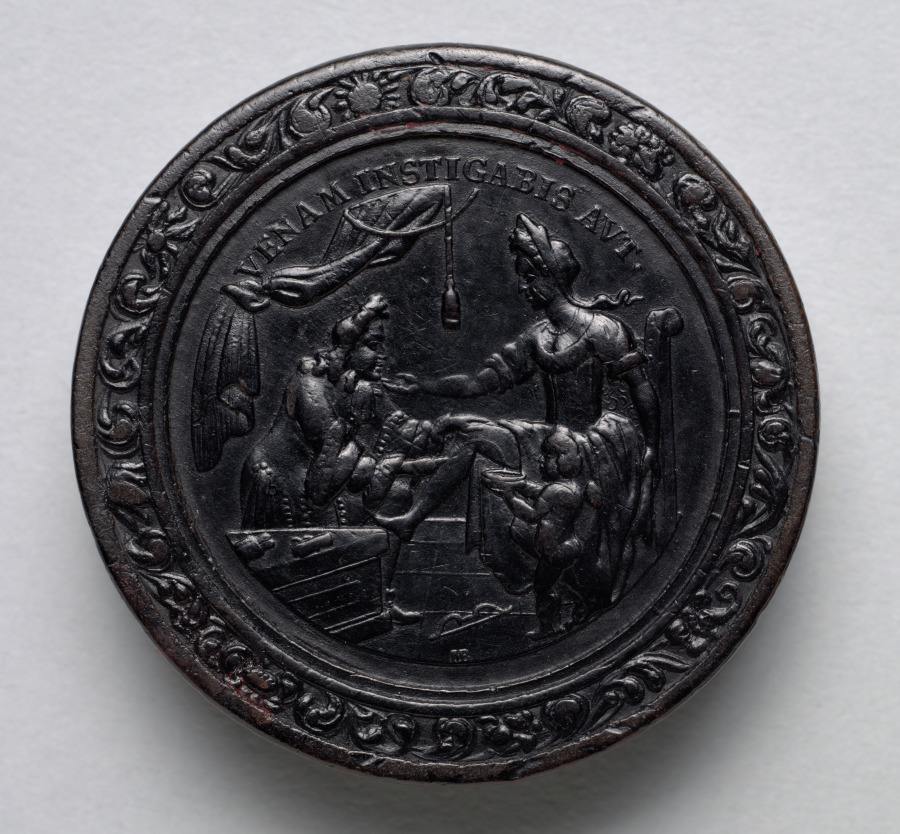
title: Gaming Piece (reverse)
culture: Germany, late 17th-early 18th Century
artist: Martin Brunner (German, 1659–1725)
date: c.1700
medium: wood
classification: Furniture and woodwork